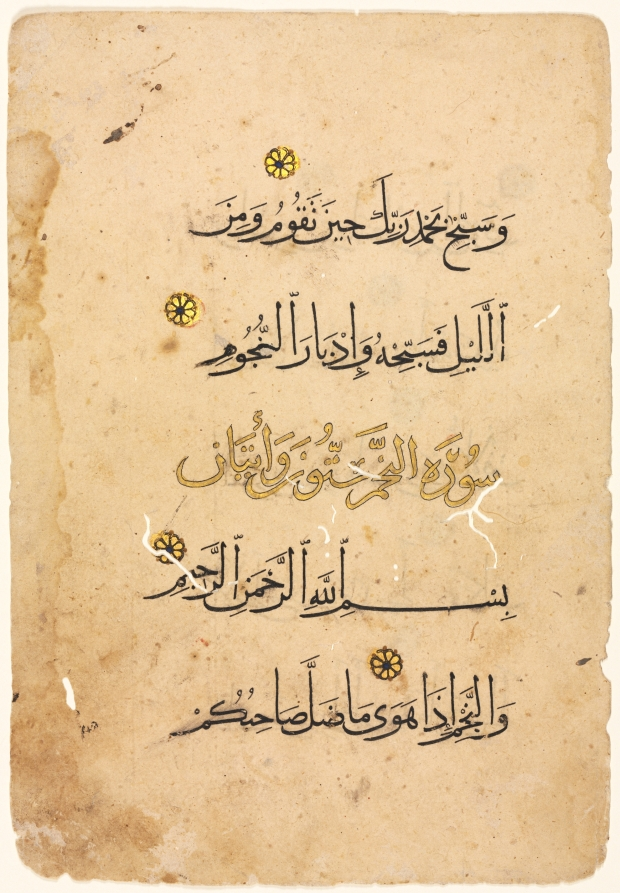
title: Qur'an Manuscript Folio (recto)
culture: Egypt, Mamluk sultanate (1250–1517)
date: 1300s–1400s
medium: ink, gold, and colors on paper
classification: Drawing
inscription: Sura al-Tur [Chapter:The Mountain] 52: part 48-end 49; Sura al-Najm [The Stars] 53: 1-part 2 (Arabic) Script: Muhaqqaq (five lines to a page)